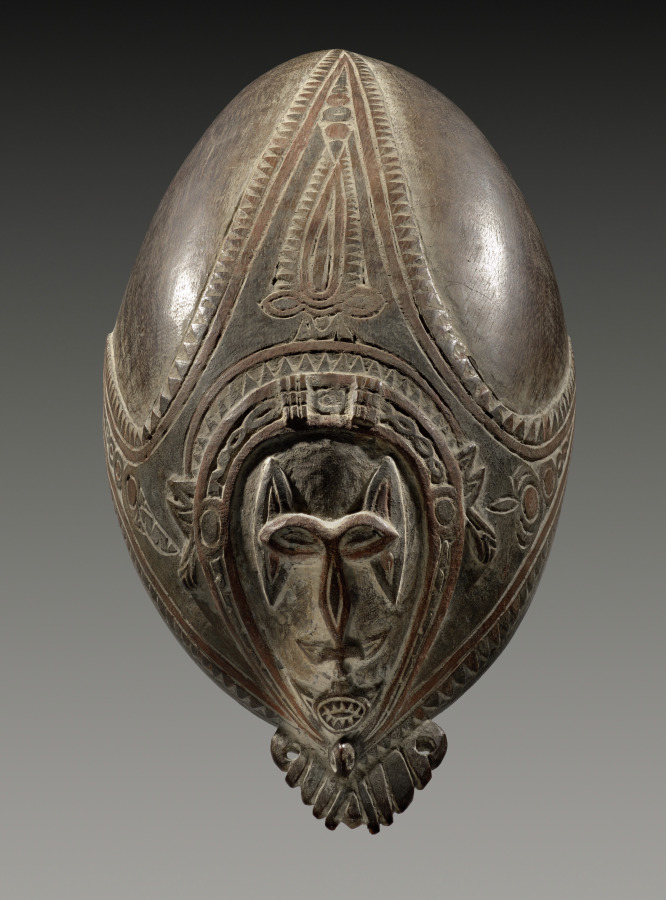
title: Bowl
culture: Melanesia, Papua New Guinea, Huon Gulf, Tami Islands, 19th century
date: 1800s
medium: painted wood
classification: Sculpture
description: The people of the Tami Islands manufactured canoes, house beams, drums, bowls, lime spatulas, and neckrests using tools such as stone axes, bamboo knives, tree-bear teeth, and pig, cassowary, and dog bones. Tami bowls were carved from the hard wood of the azalea and decorated with patterns that vary from deep etching to high relief. Many bowls were blackened with a graphite compound and highly polished. Decorative patterns were owned by specific families, and could not be used by other carvers.